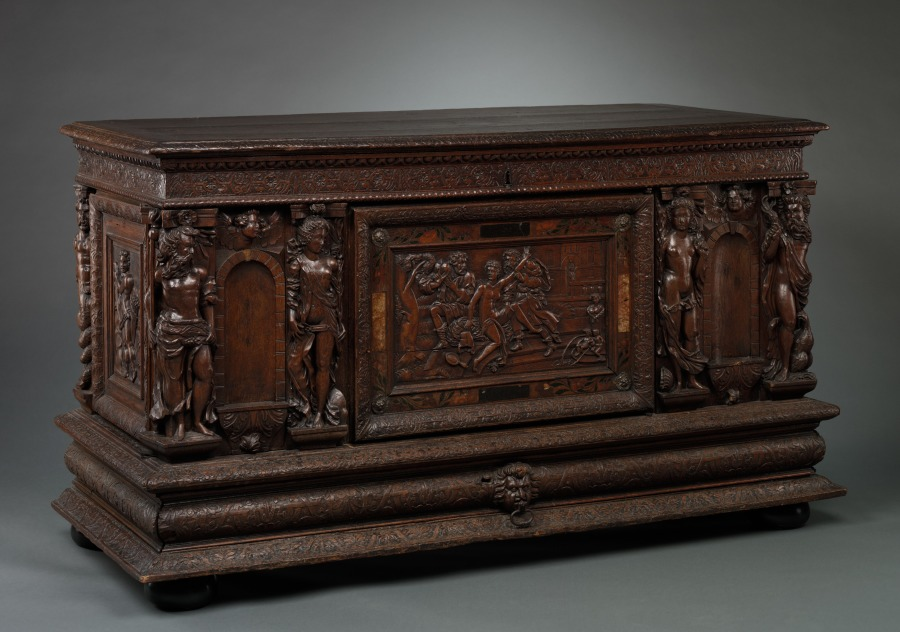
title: Chest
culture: France, Normandy, 16th century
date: 1550–1599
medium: oak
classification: Furniture and woodwork